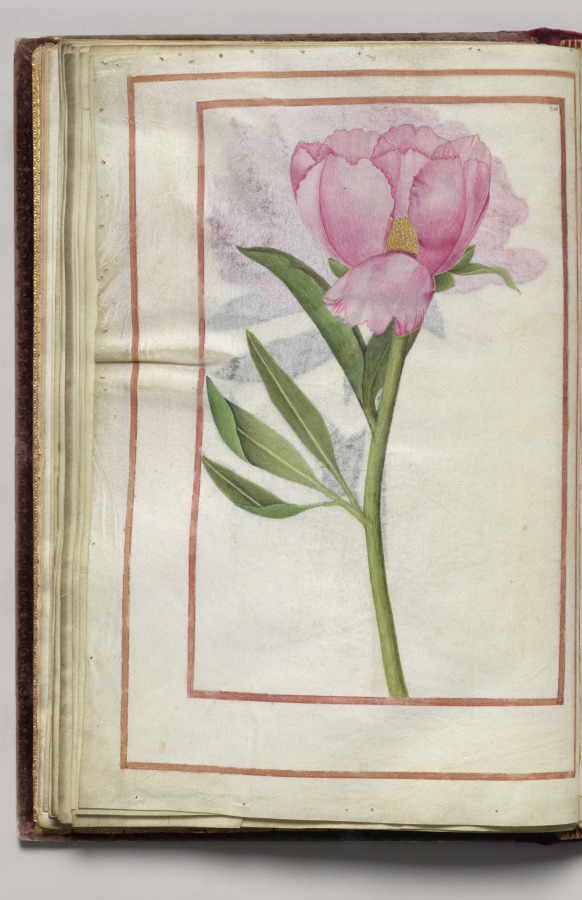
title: Pink Peony, folio 17 (verso), from Florilegium (A Book of Flower Studies)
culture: France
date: 1608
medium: watercolor, ink, silver, and gold over occasional traces of pencil, on vellum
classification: Bound Volume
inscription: Dated: Poitiers 1608 (on frontispiece) Signed: On frontispiece in black ink, lower right: Van Kuyk Notation on drawing: Frontispiece: in pencil, lower margin: * élève de Van Kessel, peintre flammand (* in pencil also appears in front of Van Kuyk's name).